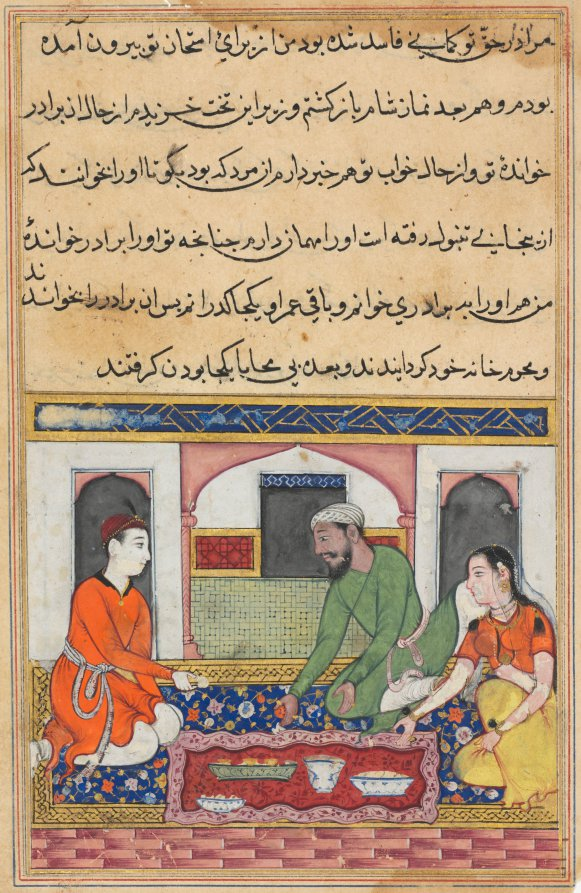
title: Shahr-Arai and her husband adopt her lover as a brother in the family, from a Tuti-nama (Tales of a Parrot): Fortieth Night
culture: Mughal India, court of Akbar (reigned 1556–1605)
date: c. 1560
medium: gum tempera, ink, and gold on paper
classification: Painting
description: Shahr-Arai and her husband sit together on the right, offering food to Shah-Arai’s lover. She has successfully tricked her gullible husband, and he gladly welcomes the young man into their household. From this point on, the three live happily together—the husband never uncovering the truth of Shah-Arai’s deception.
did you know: A lack of facial hair signals the lover’s youth.